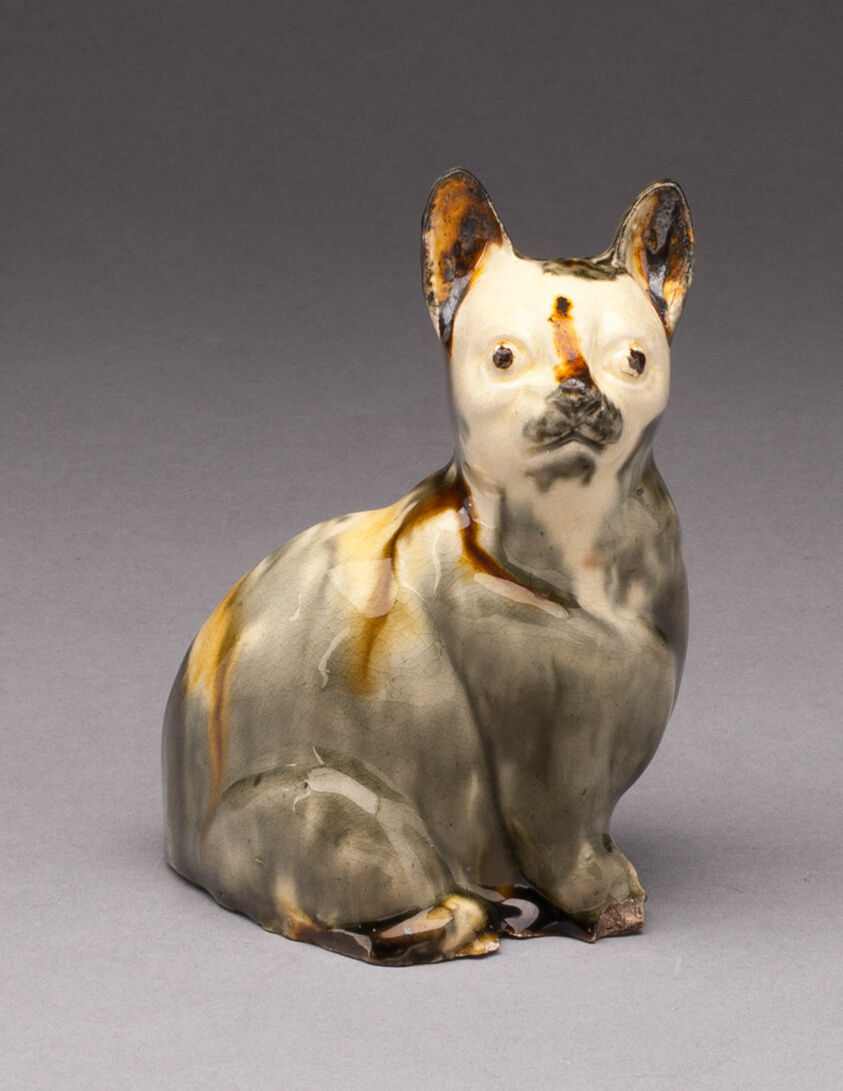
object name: Ceramics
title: Cat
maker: England, Staffordshire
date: 1760/70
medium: Lead-glazed earthenware (creamware)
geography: Staffordshire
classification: earthenware; ceramics; european decorative arts; creamware; lead-glazed earthenware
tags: cats, animals